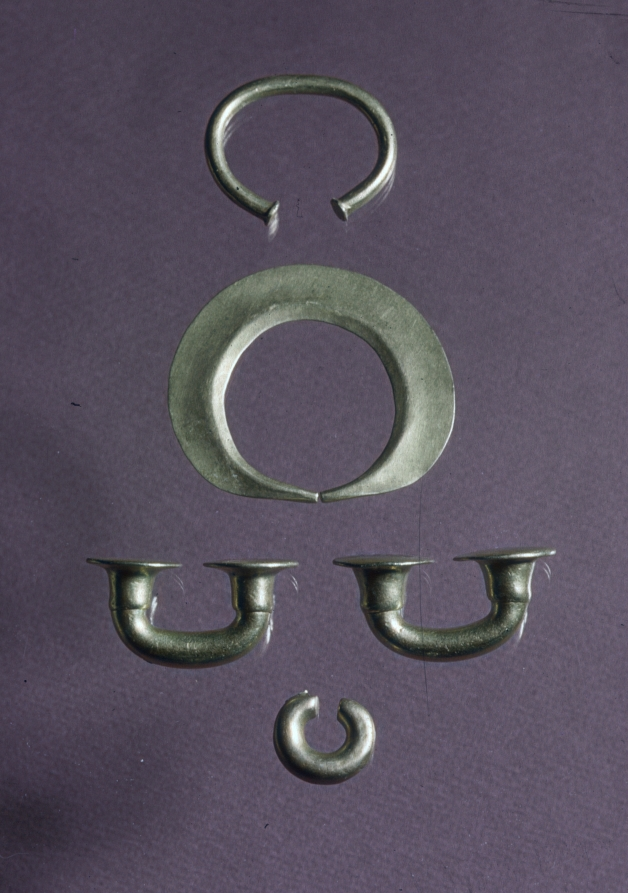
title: Nose Ring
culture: Colombia, Quimbaya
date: before 1550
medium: gold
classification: Jewelry